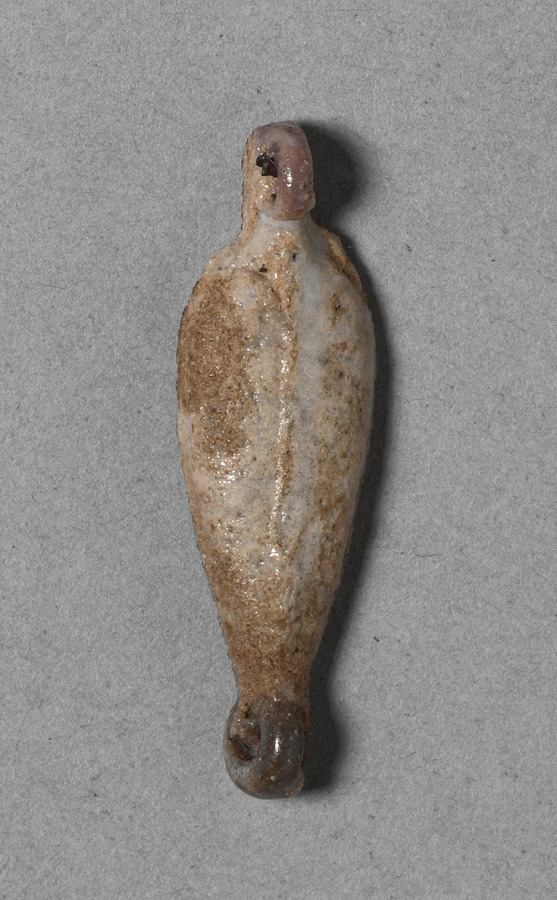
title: Petal-Shaped Bead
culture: Egypt, New Kingdom (1540–1069 BCE), Dynasty 18, reign of Amenhotep III (1390–1352 BCE)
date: c. 1391–1353 BCE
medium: faience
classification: Jewelry